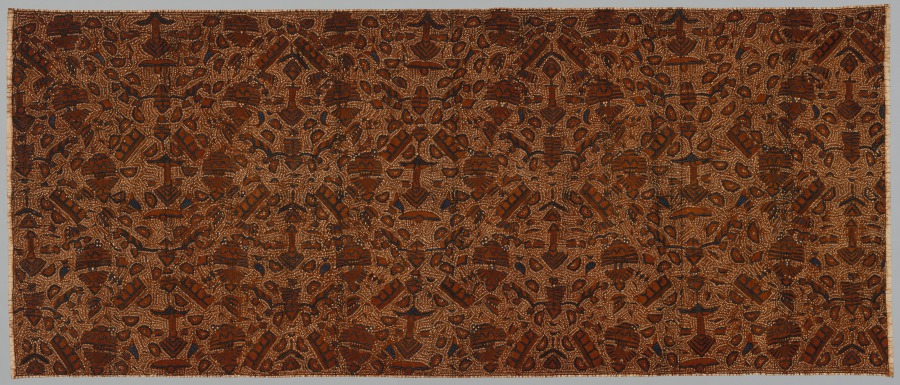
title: Waist Cloth (Kain Panjeng)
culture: Indonesia, Central Java, 19th century - early 20th century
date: 1800s-early 1900s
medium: cotton: batik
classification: Textile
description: Unlike the Chinese and sometimes European motifs of northern Javanese batiks, the motifs represented on the batiks of central Java are indigenous. However, due to the influence of Islam, they are represented in a very abstract, stylized fashion. In this batik, a celestial scene—probably signifying the ritual renewal of community life and prosperity—is repeated against a background of small filling motifs. The scene consists of a ship (represented as a divided bow and stern) bearing a Tree of Life, which signifies the community's passage to renewed life; on either side of the ship is a winged pavilion; and above is a sacred mountain, the abode of the gods, with a shrine.